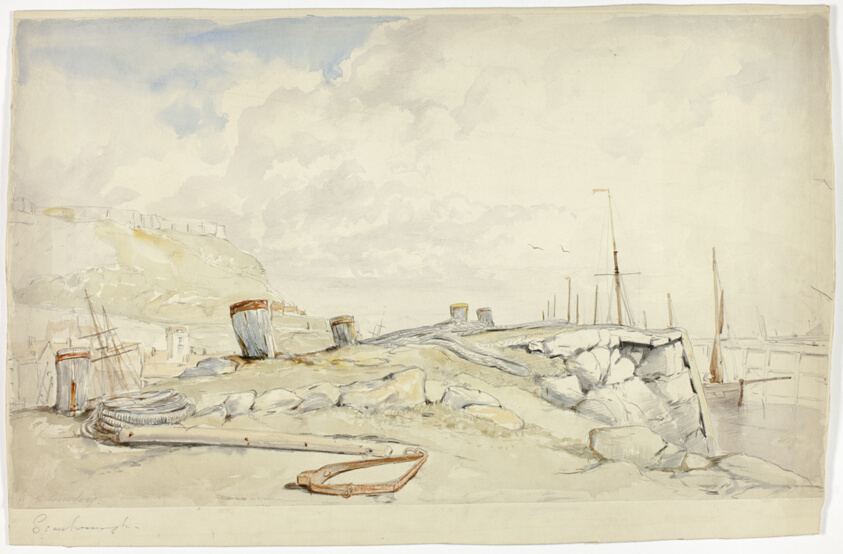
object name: Drawing and Watercolor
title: Scarborough Shore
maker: William Roxby Beverley (English, c. 1814-1889)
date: c. 1860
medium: Watercolor over graphite, on ivory wove paper, laid down on board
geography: England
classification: watercolor; drawings (visual works); prints and drawing